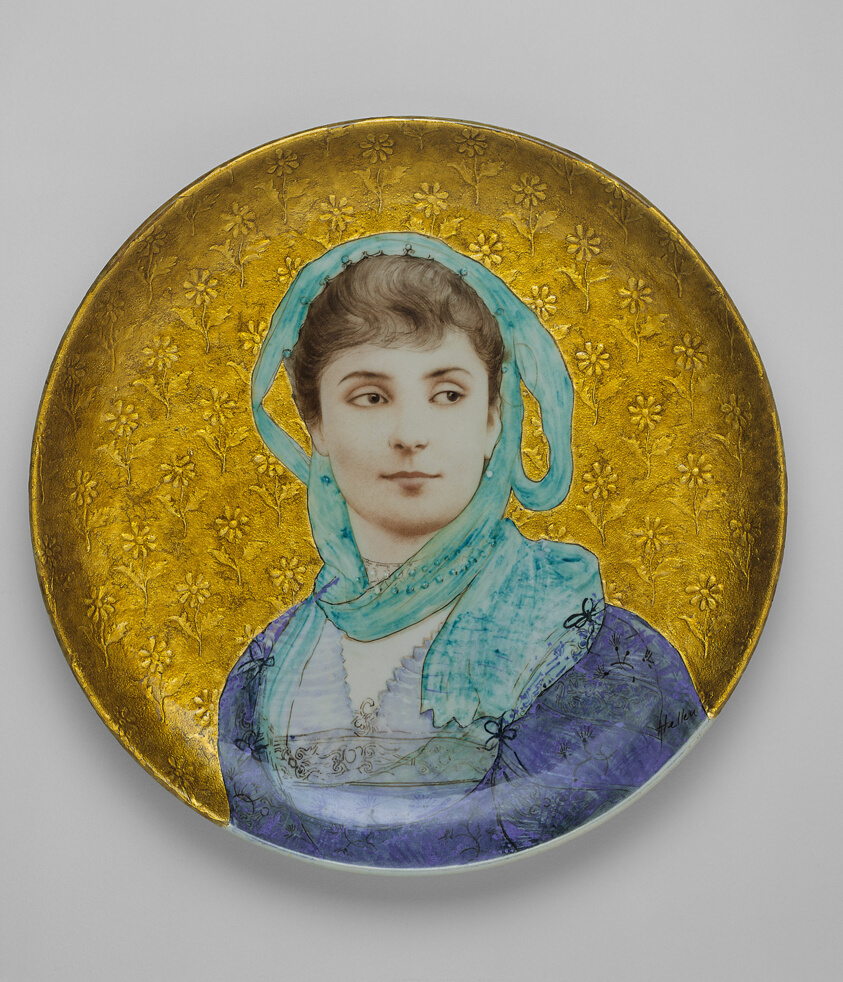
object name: Ceramics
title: Circular Plaque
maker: Made by Théodore Deck; French, 1823-1891; Painted by Paul-Cesar Helleu; French, 1859-1927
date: 1880/87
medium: Tin-glazed earthenware, polychrome enamels, and gilding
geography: France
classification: ceramics; european decorative arts